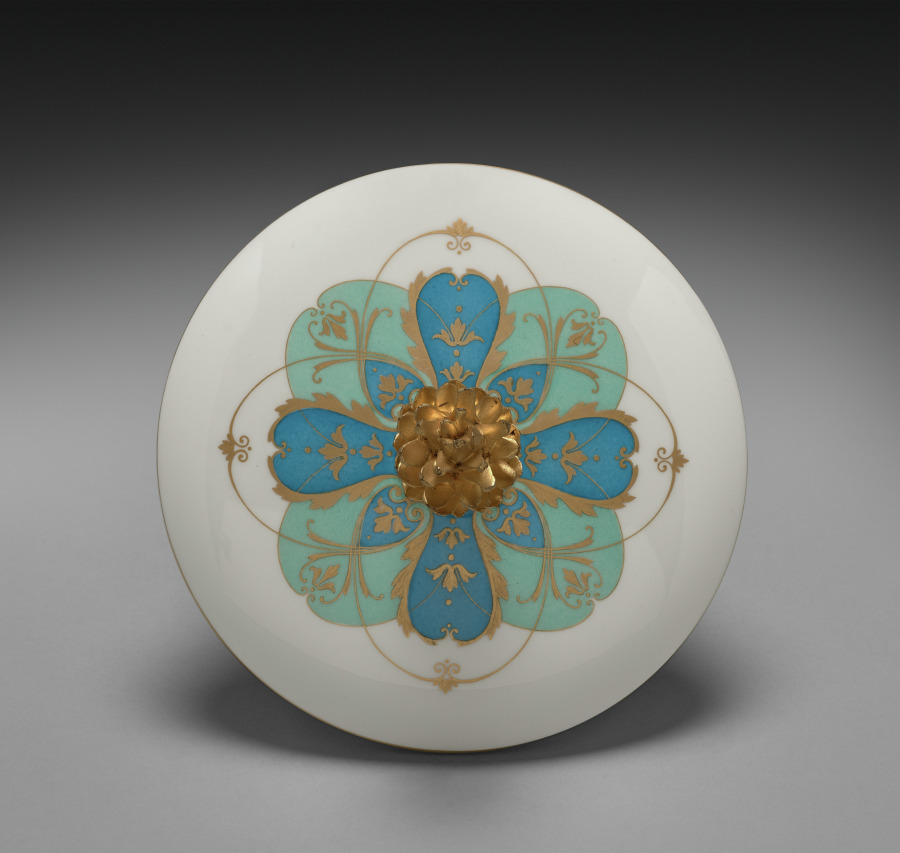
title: Vase, Feuille d'Eau (lid)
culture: France, Sèvres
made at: Sèvres Porcelain Factory (French, est. 1756)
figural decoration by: Paul Marie Roussel (French, 1804–1877)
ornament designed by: Emile Renard (French)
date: 1858–62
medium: porcelain with gilt bronze mounts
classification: Ceramic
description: Feuille d'Eau means "waterleaf" and refers to the name given to the shape of this vase at the Sèvres factory. In English, waterleaf is the common name for a plant with bell-shaped flowers. The term is also applied to a stylized plant motif used in Graeco-Roman ornament. This vase was exhibited by the Sèvres firm at the International Exhibition held in London in 1862.